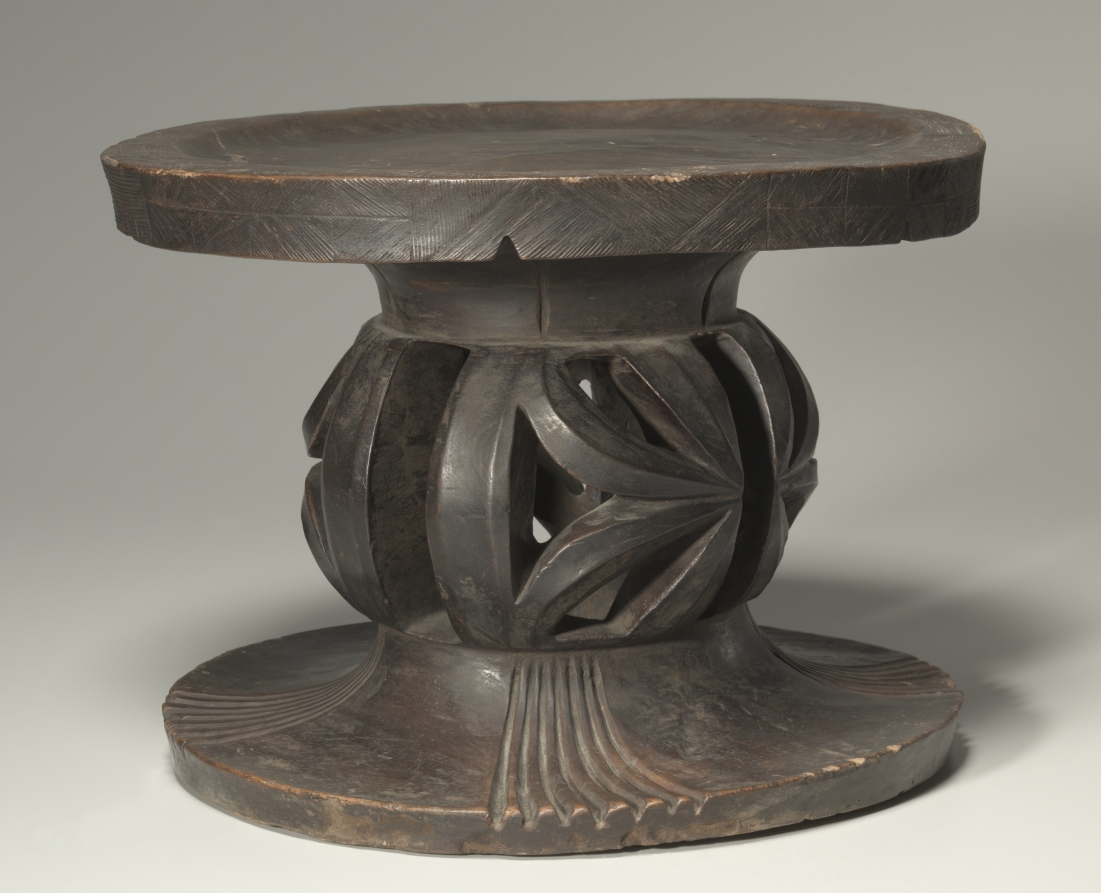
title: Stool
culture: Africa, Central Africa, Democratic Republic of the Congo, Mangbetu-style maker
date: by 1928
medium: wood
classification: Furniture and woodwork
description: Such stools were highly prized by their female owners. Sculpted by master artists with widespread reputations, they were often "signed" with a deeply cut mark on the base. This groove was then filled with red camwood as an expression of blessings and good wishes for the stool's owner.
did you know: In 1928, Paul Travis photographed the Mangbetu queen who once owned this stool as she sat on it.